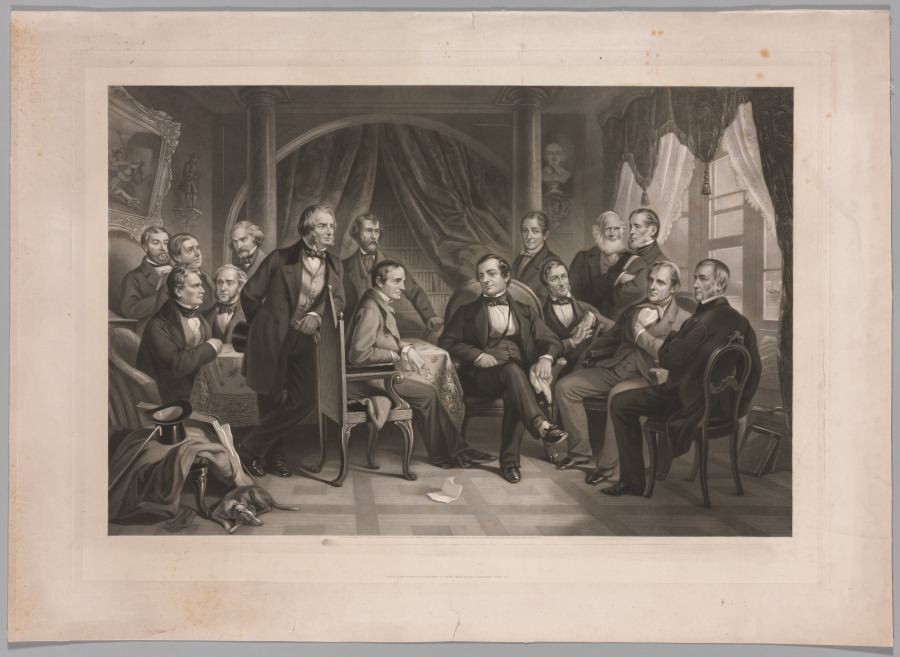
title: Washington Irving and his Literary Friends at Sunnyside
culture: America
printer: Thomas Oldham Barlow (British, 1824–1889)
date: 1864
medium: engraving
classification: Print